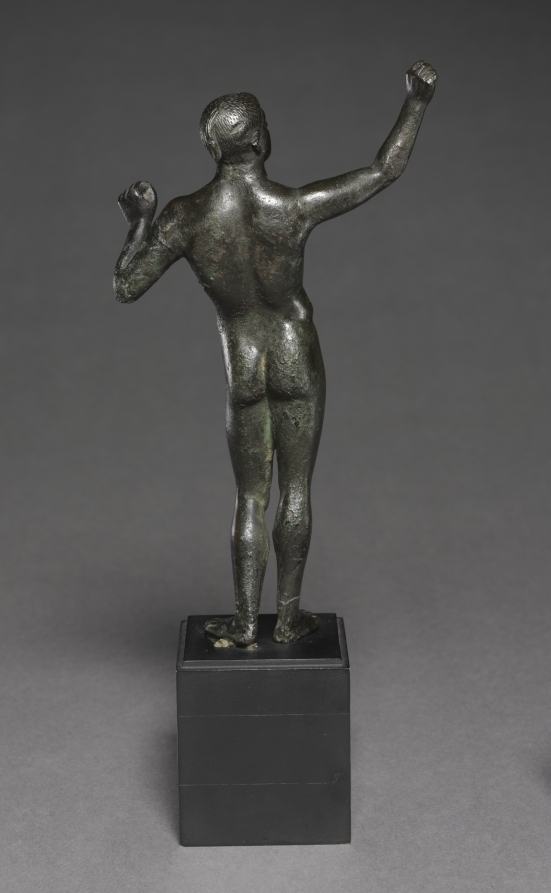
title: Boxer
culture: Greece, Greco-Roman Period, late Ptolemaic Dynasty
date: 100–30 BCE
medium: bronze. solid cast, with copper inlays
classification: Sculpture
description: This boxer raises his arms to pull tight the thongs (now lost) that Greek and Roman boxers wound around their hands for protection. The sinuous body curve and long proportions are characteristic of the late Hellenistic period, when artists created more elongated versions of athletes and other classical figures.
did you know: The long topknot (cirrus) identifies this athlete as a hand-to-hand fighter, most likely a boxer.